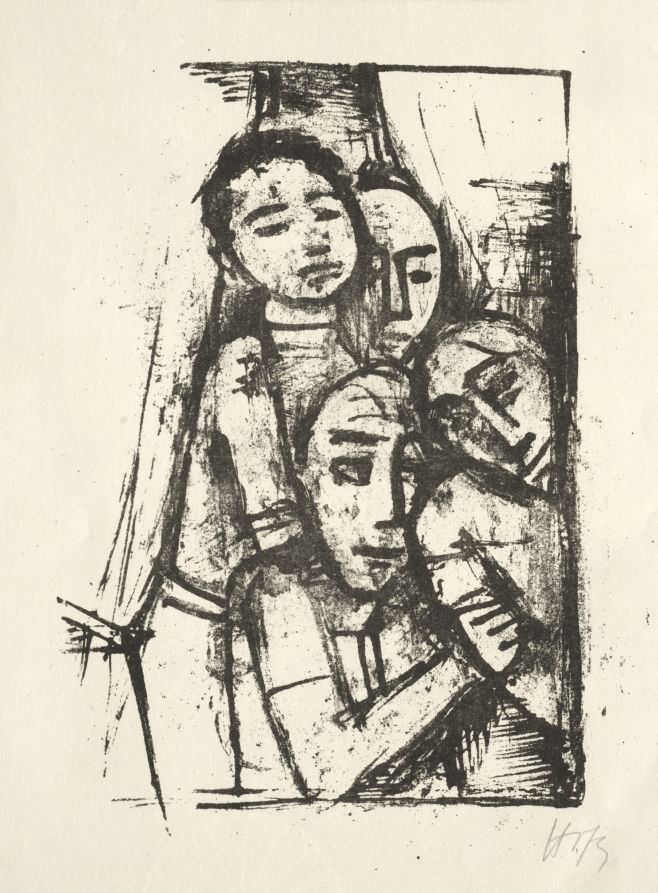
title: At the Window II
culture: Germany, 20th century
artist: Karl Hofer (German, 1878–1955)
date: c. 1923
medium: lithograph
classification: Print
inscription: signed, in pencil, at lower right: Hofer; inscribed, in pencil, at lower right: 164/43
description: Windows appear frequently throughout the work of Karl Hofer, who created nearly 300 prints. Dating from a period that Hofer spent in his native Germany between the First and Second World Wars, this lithograph reflects the anxiety and chaos that characterized the country during that time. Figures with masklike faces crowd the space of an interior without interacting. It remains unclear whether they block the view to the outside world that the window would otherwise provide or are instead viewed from a building’s exterior. Enhanced by the jagged, sketchy lines used to render the figures, the composition conveys a sense of alienation and unease.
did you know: Just over a decade after this print was made, Karl Hofer was labeled a "Degenerate Artist" by the National Socialists and his works were removed from German museums.